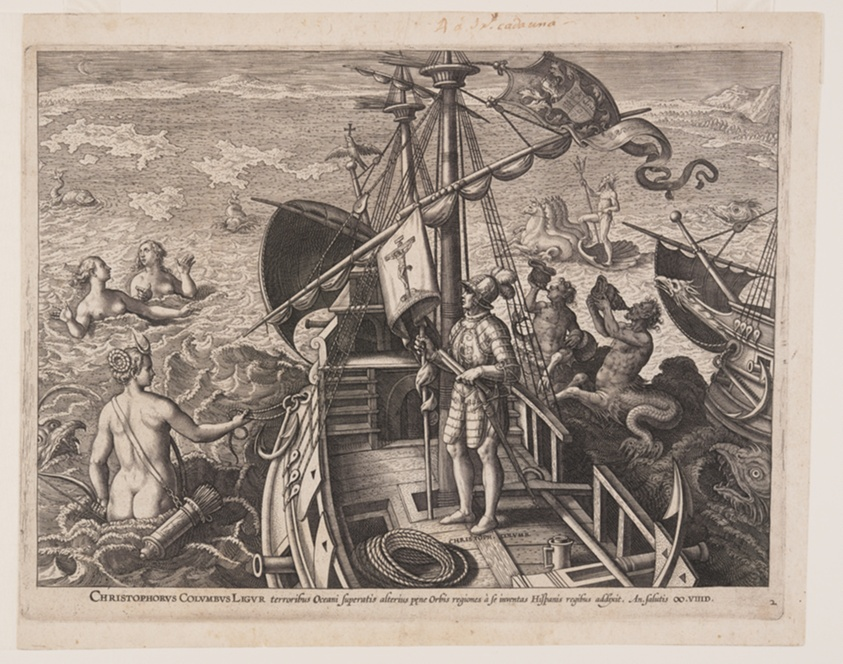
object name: Print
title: Christopher Columbus on His Ship, from Americae Retectio (The Discovery of America)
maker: Adriaen Collaert (Flemish, c. 1560–1618); after Jan van der Straet (Flemish 1523–1605)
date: c. 1589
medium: Engraving on ivory laid paper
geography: Flanders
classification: engraving; paper; print; prints and drawing